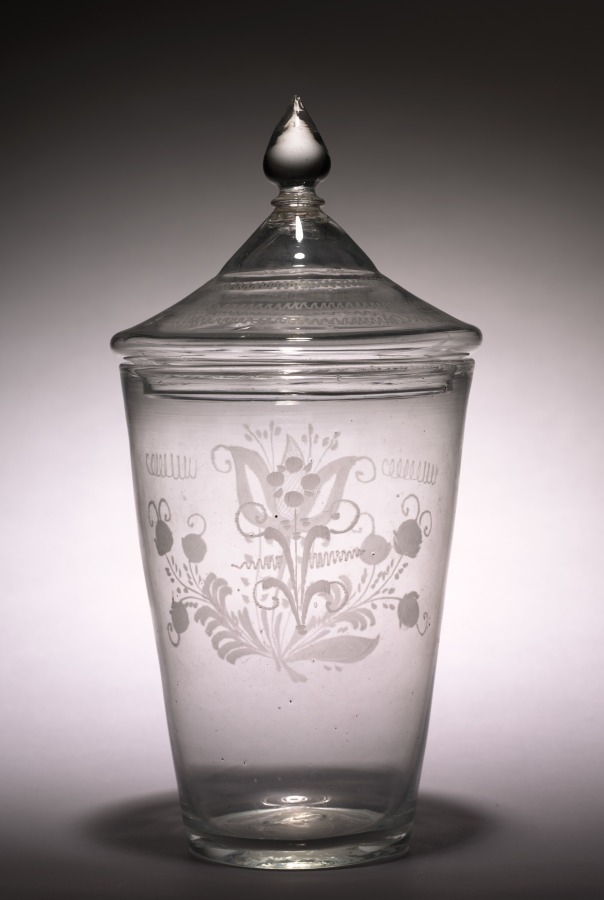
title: Flip Glass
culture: America, late 18th century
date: late 1700s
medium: glass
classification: Glass